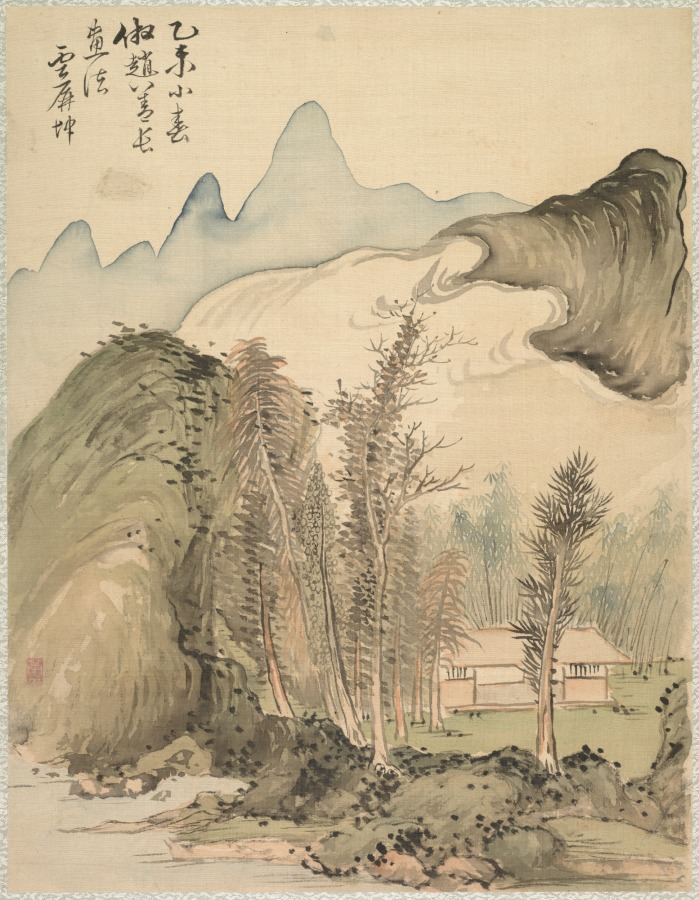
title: Hut Amidst the Trees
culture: Japan, Edo period (1615–1868)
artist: Tsubaki Chinzan (Japanese, 1801–1854)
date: 1847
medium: album leaf; ink and color on silk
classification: Portfolio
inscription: Tsubaki Chinzan inscribed each leaf with the same inscription that Zhai Dakun wrote on his album leaves.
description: As the title of this album suggests, Tsubaki Chinzan painted each of the landscapes included in the album after interpretations of the styles of old masters by Chinese painter Zhai Dakun (翟大坤, active 1730–1804). In addition to the painted compositions, he also copied the inscriptions on Zhai Dakun's paintings.